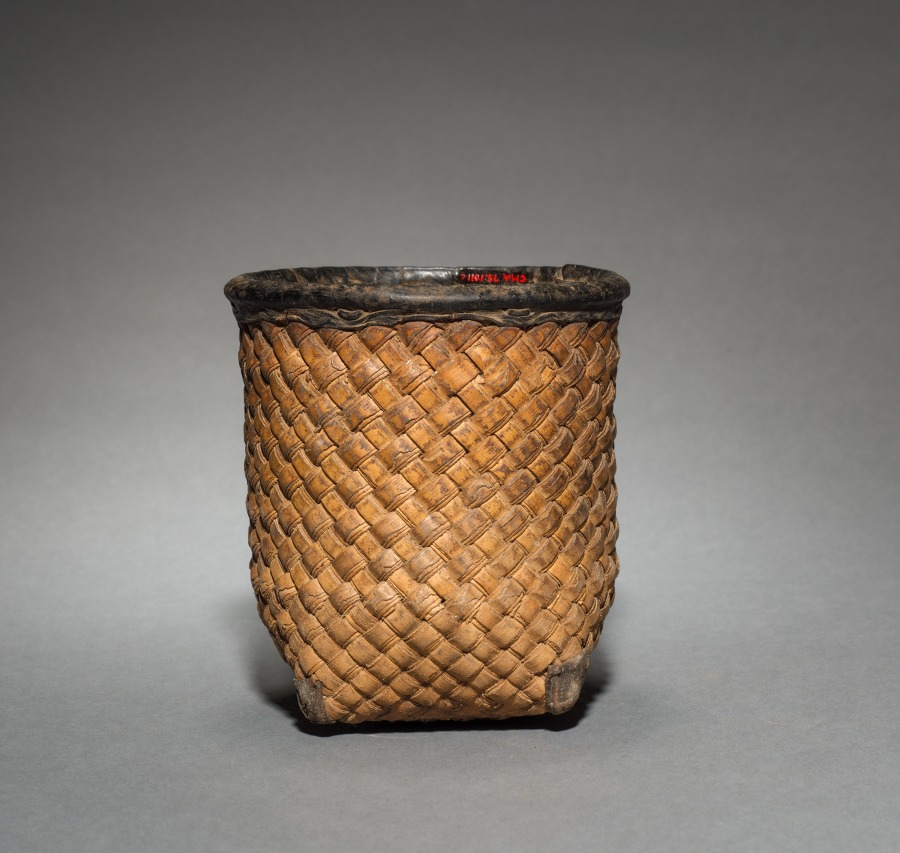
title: One of Ten Nesting Wedding Baskets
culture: Africa, Western Sudan, Burkina Faso, Lobi, 20th century (?)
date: c 1900s ?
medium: Plant fiber and leather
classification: Vessels